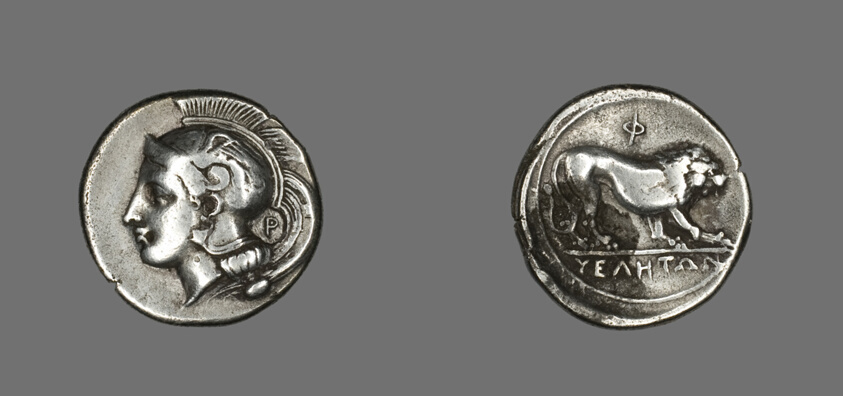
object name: Coin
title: Stater (Coin) Depicting the Goddess Athena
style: greek, ancient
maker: Greek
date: 400-317 BCE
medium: Silver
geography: Elea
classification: coin; struck; ancient art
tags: Athena, lions